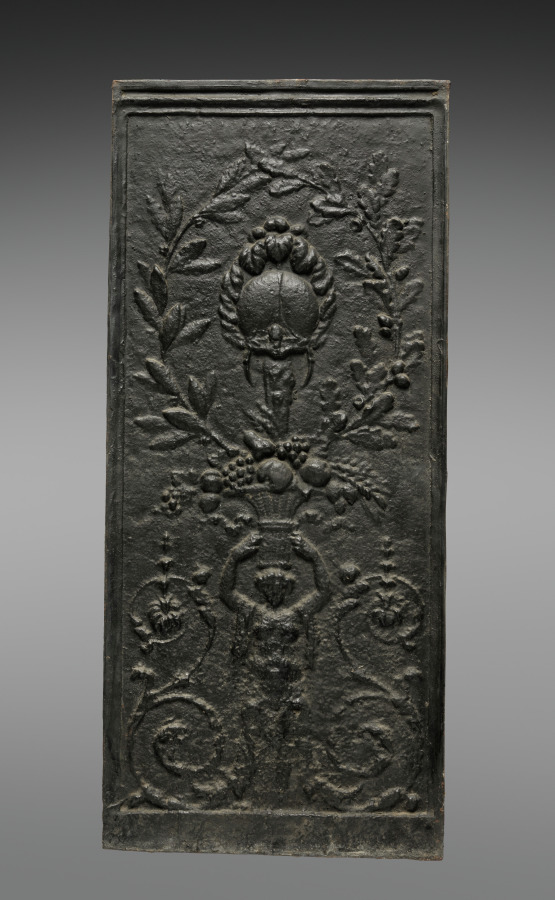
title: Set of Fire Linings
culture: France, style of Louis XVI, 18th Century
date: c. 1770–1780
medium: cast iron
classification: Furniture and woodwork